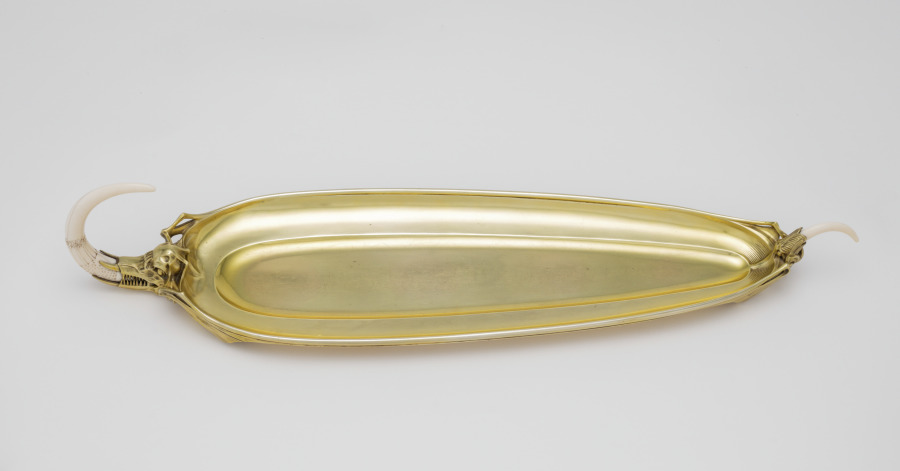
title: Tray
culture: France, Paris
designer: Carlo Bugatti (Italian, 1856–1940)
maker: Adrien-Aurélien Hebrard (French, 1866–1937)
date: c. 1907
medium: Gilt silver and ivory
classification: Silver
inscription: Made by A. A. Hebrard Firm, Paris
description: This tea and coffee service, salver, and table, together with some now missing cups, were all designed by Carlo Bugatti as an ensemble and presented at the 1902 exposition devoted to decorative arts in Turin, Italy. The set was probably acquired from Bugatti's 1907 exhibition at the Galerie Hébrard in Paris by a wealthy South African widow, Anna Blake, who was living there at the time. Some of the animal and insect motifs suggest mythical beasts or the fossils of prehistoric animals. When Mrs. Blake returned to Cape Town, she took these and other pieces designed by Bugatti with her, and they remained in South Africa throughout her lifetime.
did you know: This tray is part of a tea and coffee service designed by Carlo Bugatti.